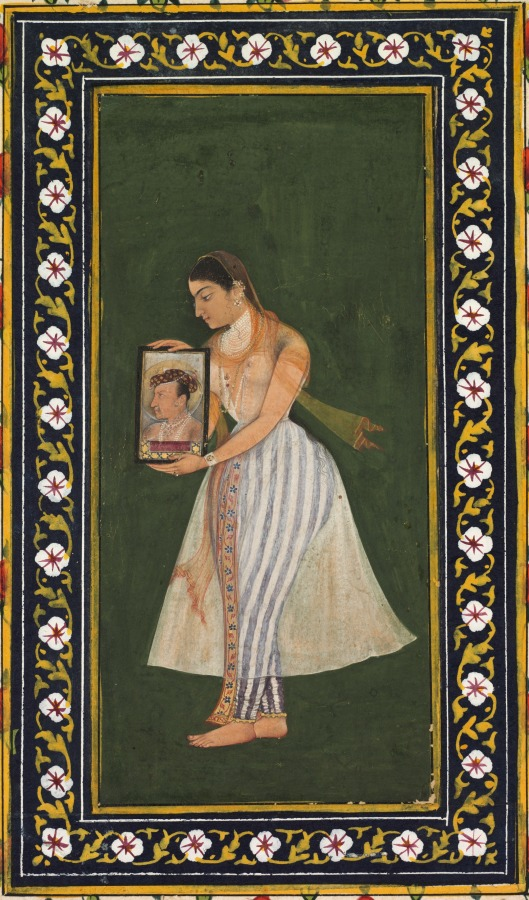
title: Nur Jahan holding a portrait of Emperor Jahangir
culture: Mughal India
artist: attributed to Bishandas (Indian)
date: c. 1627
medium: gum tempera and gold on paper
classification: Painting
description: A woman identified as the favorite wife of the Mughal emperor Jahangir (reigned 1605–27) holds a formal portrait of her husband. He appears aged with graying facial hair behind the jharokha carpet that marks imperial presence. This painting may be modeled on a work depicting Jahangir holding a portrait of his deceased father, showing himself to be the legitimate successor. Nur Jahan, who handled most of the affairs of state, hoped to remain in power after his death. She is depicted in her idealized youth, since she would have been 50 years old when Jahangir died.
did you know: Jahangir died at 58, outliving his younger brothers by about 25 years.